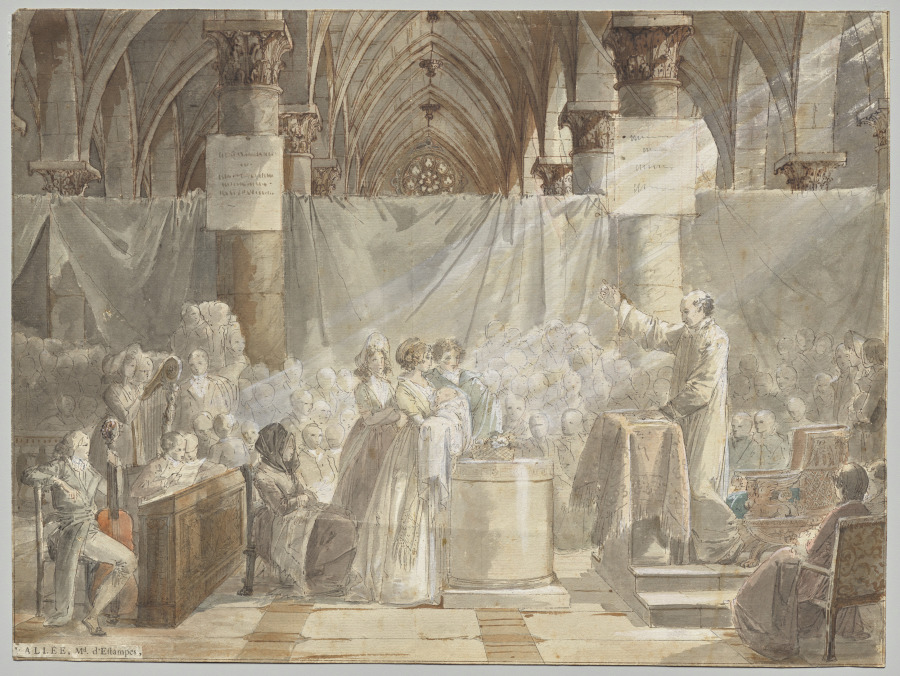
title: A Christening in Revolutionary France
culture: France, 19th century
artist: Jean-Baptiste Mallet (French, 1759–1835)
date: late 18th century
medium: Pen and brown and gray inks and red chalk and watercolor, heightened with white; squaring for transfer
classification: Drawing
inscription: verso, upper left corner, in graphite: paoli 30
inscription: lower left corner, label pasted down on sheet: VALLEE, Md. D'Estampes,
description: Mallet’s image depicts a Republican baptism ceremony during the French Revolution. The event takes place in a magnificent Gothic church, identifiable as such by its pointed arches and stained glass window. A mother presents her infant to the priest who raises his right hand as he administers the sacrament. Even the musicians pause from playing to watch this spectacle.